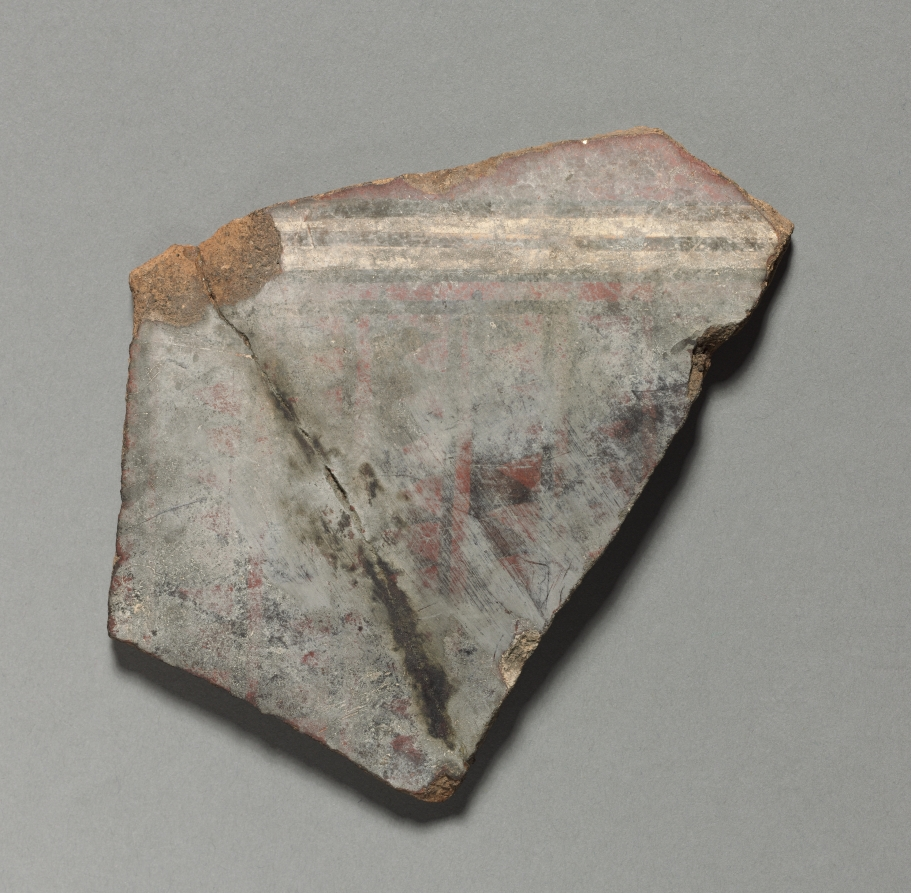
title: Fragment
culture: Peru, Inka, 1400-1532 AD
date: 1400–1532 AD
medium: pottery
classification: Ceramic